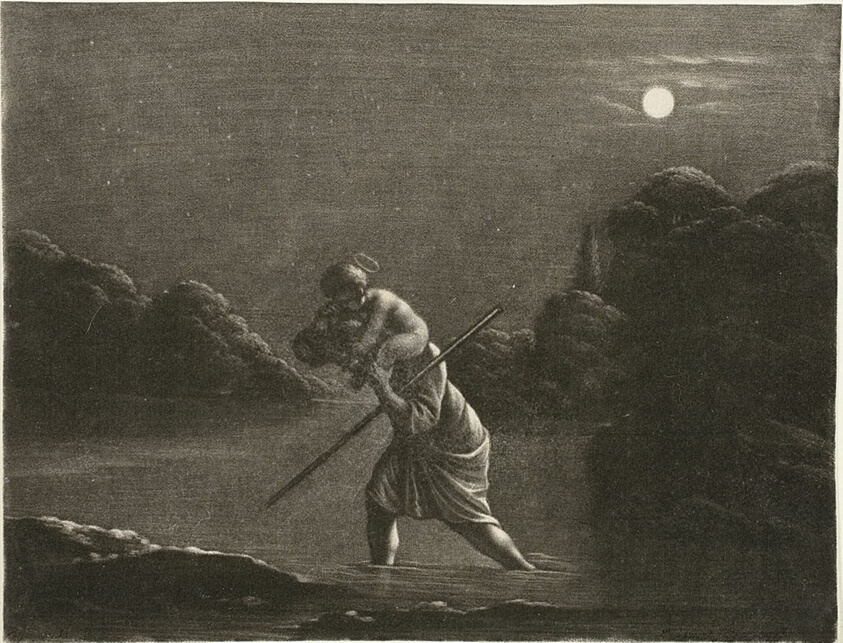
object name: Print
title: Saint Christopher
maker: Wallerant Vaillant (Dutch, 1623-1677); after Cornelis van Poelenburch (Dutch, 1594/95-1667); after Adam Elsheimer (German, 1578-1610)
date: 1665/77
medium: Mezzotint in black on ivory laid paper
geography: Netherlands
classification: mezzotint; print; prints and drawing